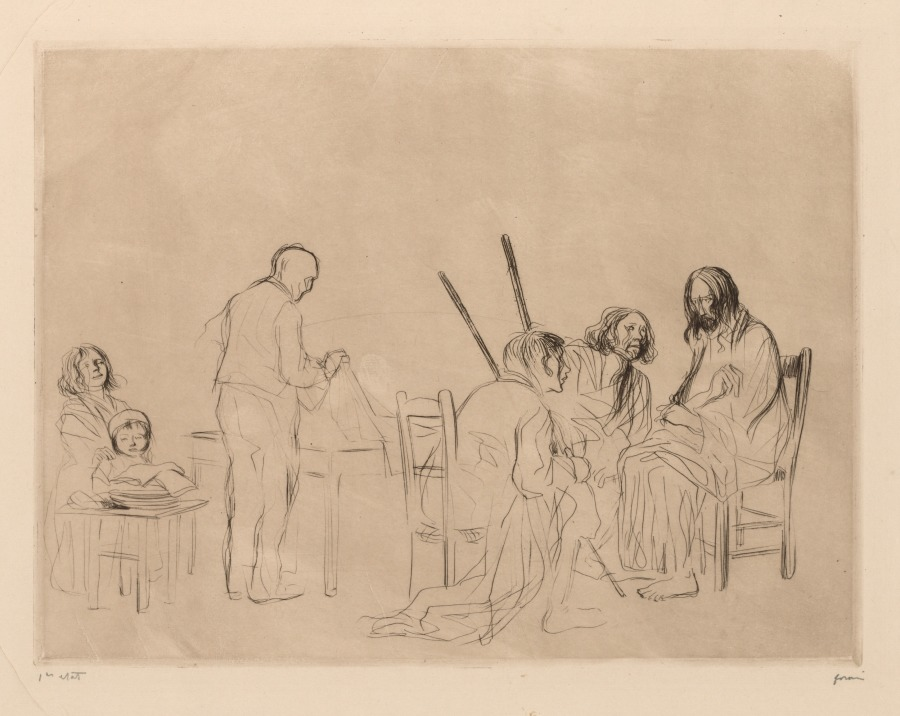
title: Before the Supper at Emmaus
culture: France, 19th-20th century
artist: Jean Louis Forain (French, 1852–1931)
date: 1910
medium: etching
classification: Print